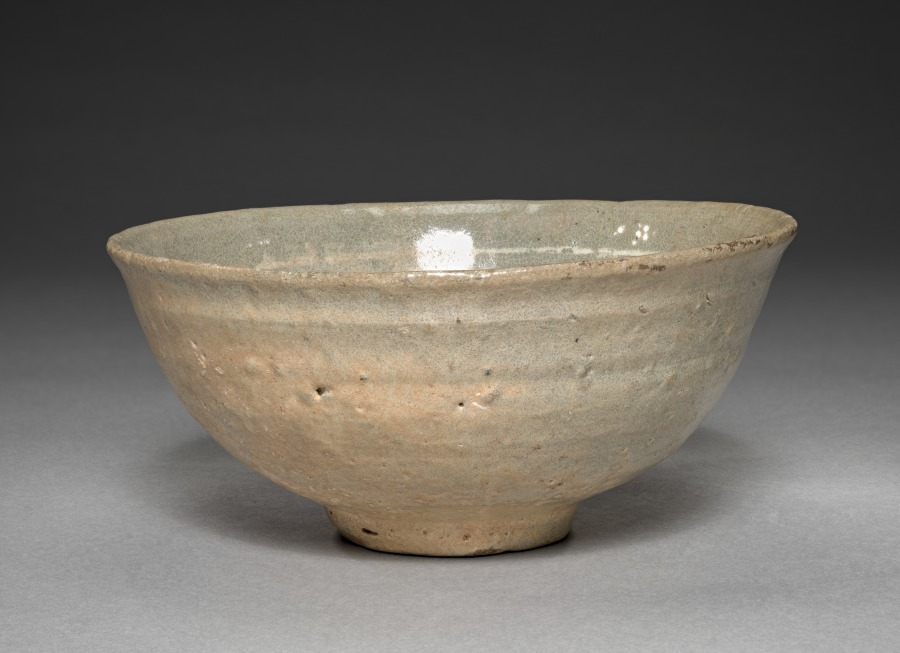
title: Bowl with White-slip Decorations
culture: Korea, Joseon dynasty (1392–1910)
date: 1600s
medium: glazed ceramic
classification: Ceramic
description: This type of wide-mouthed bowl was used every day in Korea, not exclusively for tea drinking. But when it was introduced to Japan around the early 1500s its imperfect appearance evoking the aesthetics of wabi-sabi caused it to be repurposed as a tea bowl. Korean tea bowls were circulated as a item of foreign luxury among Japanese military elites. It's highly possibly this type of bowl was produced in one of the kilns operated by the trading office Busan in Southern Gyeongsang province, and exported to Japan.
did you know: This type of rustic tea bowl was highly appreciated among advanced Japanese practitioners of the tea ceremony.